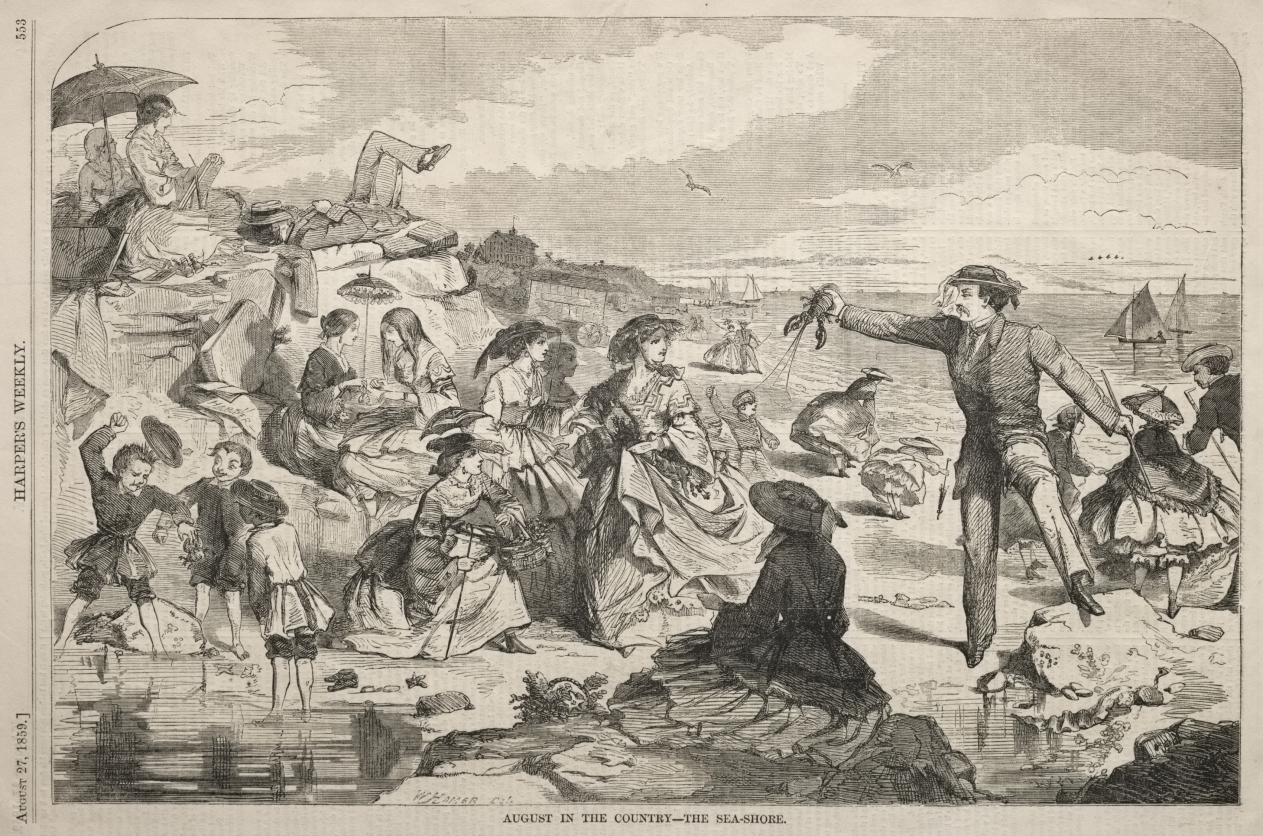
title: August in the Country - The Seashore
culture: America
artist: Winslow Homer (American, 1836–1910)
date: 1859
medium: wood engraving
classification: Print